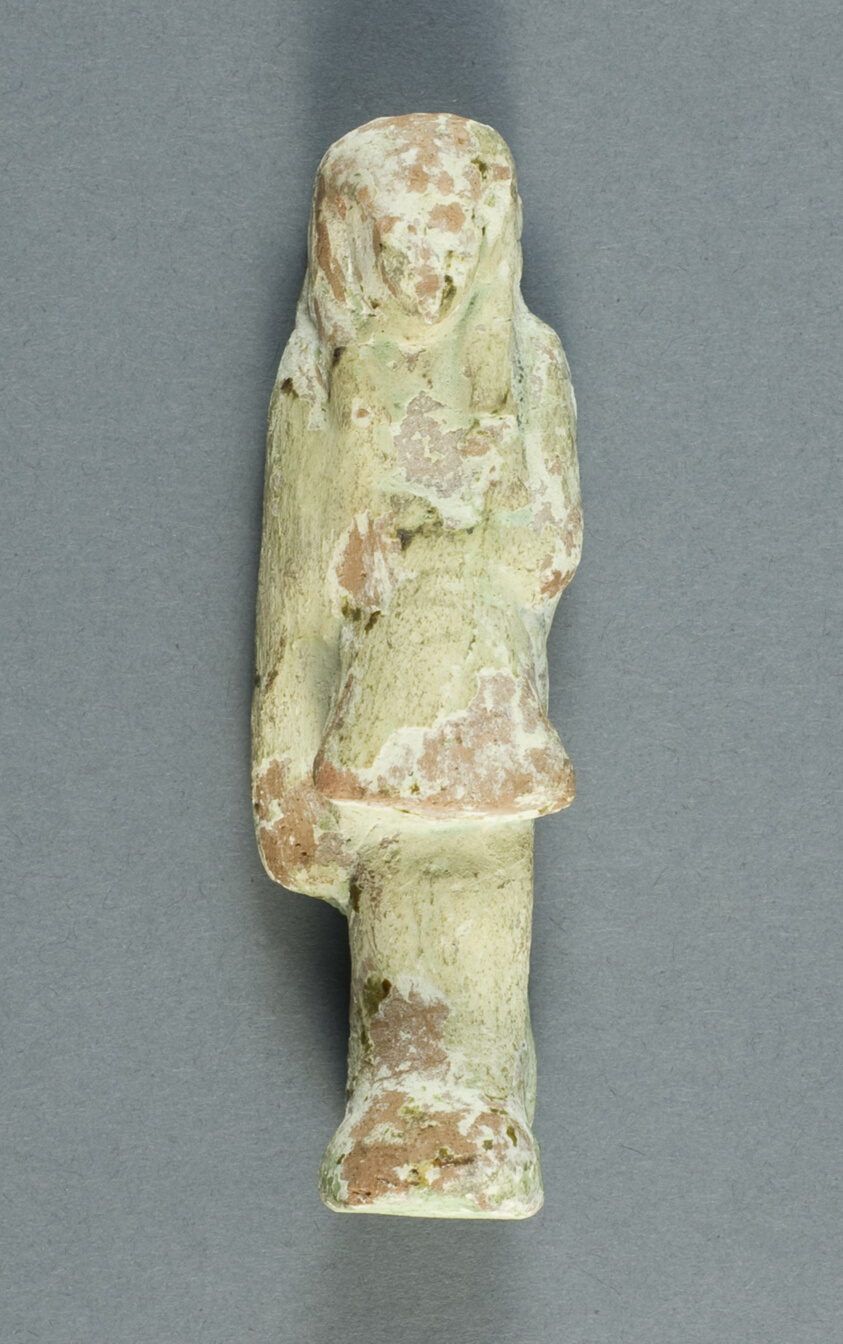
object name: Funerary Object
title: Shabti of Tantowy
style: egyptian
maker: Egyptian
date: Third Intermediate Period, Dynasty 21 (about 1069–945 BCE)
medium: Ceramic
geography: Egypt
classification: ushabti; ceramics; funerary; figurine; ancient art